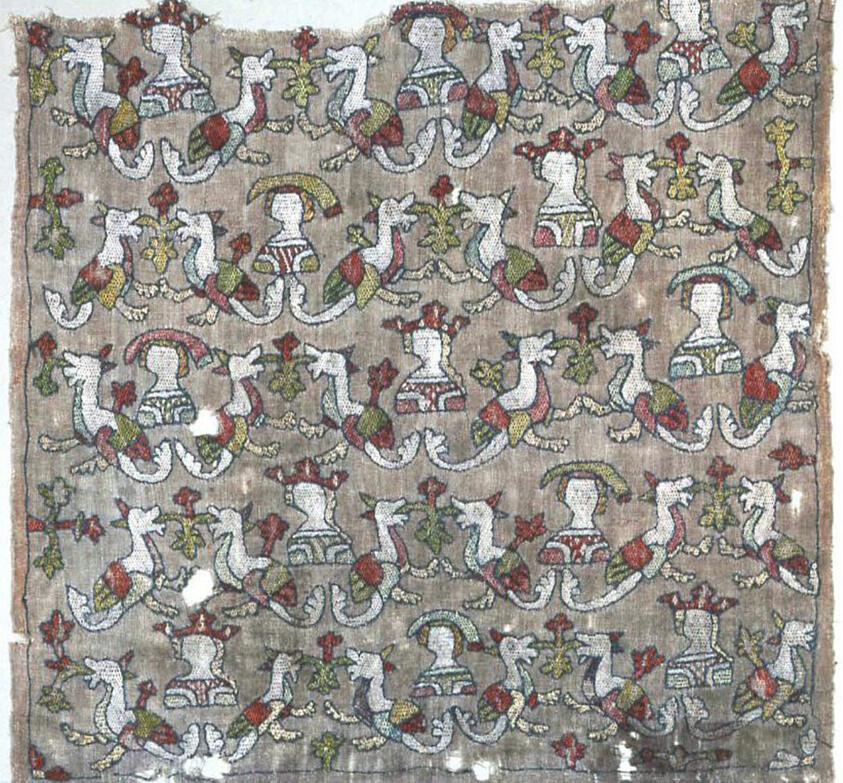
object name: Textile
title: Panel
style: medieval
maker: Germany, Lower Saxony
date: 1350/75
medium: Linen, plain weave; embroidered with linen and silk in crossed back and stem stitches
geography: Germany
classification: textile; needlework (visual works)